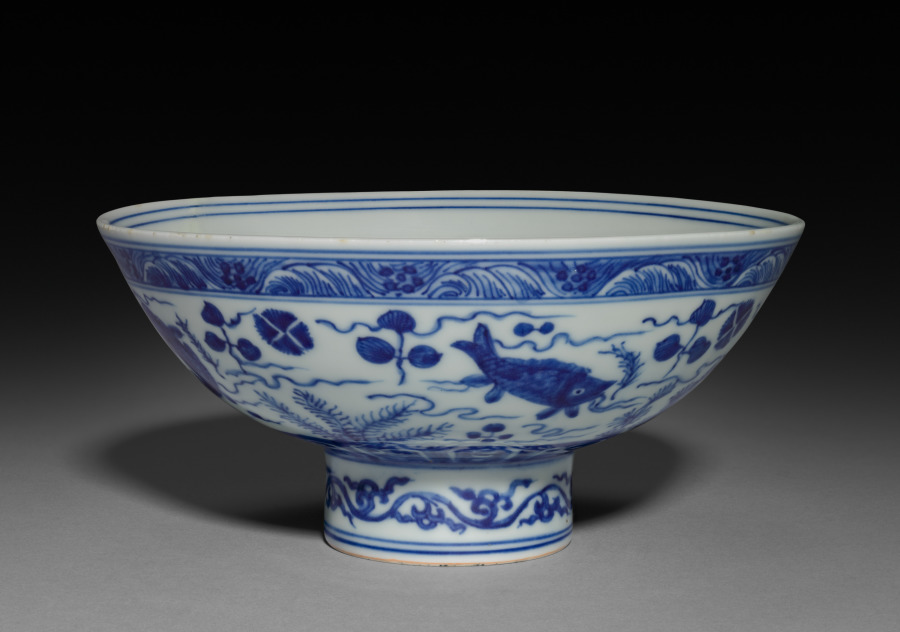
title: Bowl with Fish and Water Plants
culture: China, Jiangxi province, Jingdezhen kilns, Ming dynasty (1368-1644), Jiajing mark and reign (1522-66)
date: 1522–66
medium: porcelain with underglaze blue decoration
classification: Ceramic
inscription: 大明嘉靖年製